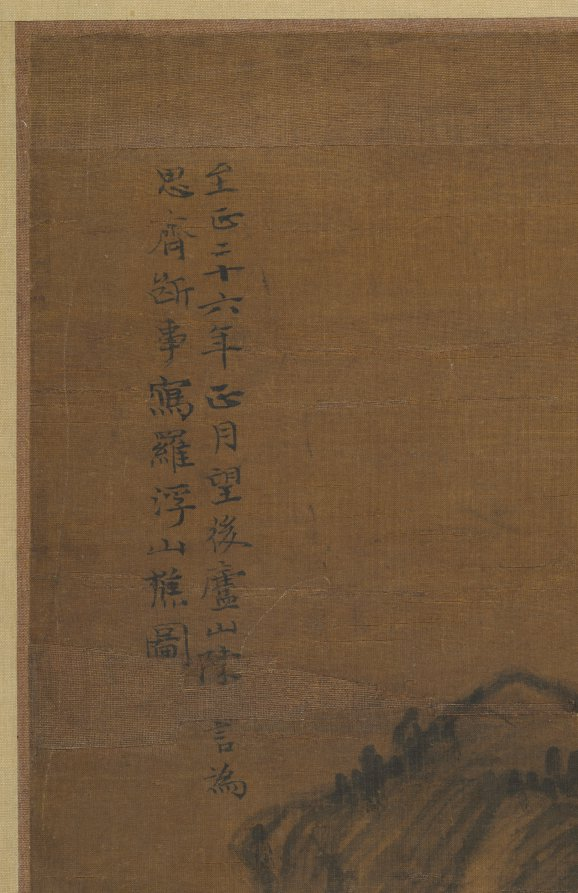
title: The Woodcutter of Luofu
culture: China, Yuan dynasty (1271-1368)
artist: Chen Ruyan (Chinese, c. 1331–1371)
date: 1366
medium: Hanging scroll; ink on silk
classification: Painting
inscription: 至正二十六年（1366）正月望後廬山汝言為思齊斷事寫羅浮山樵圖。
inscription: 2 colophons and 18 additional seals: 5 seals of Wang Shimin 王時敏 (1592–1680); 2 seals of Gong Xianglin 龔翔麟 (1658–1733); 1 colophon, dated 1684, of Yan Shengsun 嚴繩孫 (1623–1702); 1 colophon and 1 seal of Huang Ren (1683–1768); 2 seals of Lu Shusheng 陸樹聲 (3rd son of Lu Xinyuan 陸心源); 2 seals of T'ao Kuang; 1 seal of Tan Jing 譚敬 (20th c.); 3 seals of Zhang Heng 張珩 (1915–1963); 2 seals unidentified.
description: This landscape illustrates the traditionalism of Chinese painting: while the brush manner is novel, the composition is based on early Song dynasty (960-1127) models. The soft raveling brushstrokes and lumpy rock shapes are characteristic of the new 14th-century stylistic expression.